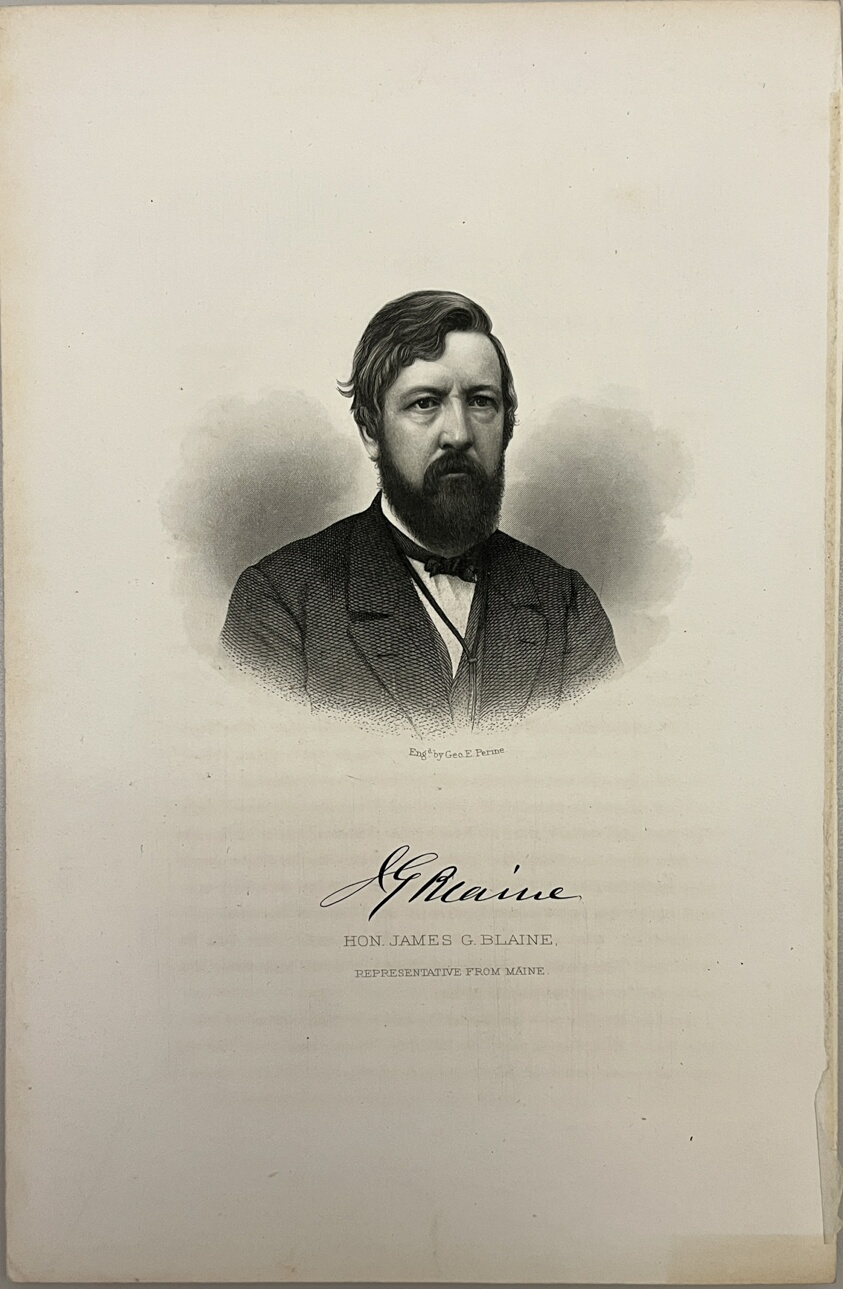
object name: Print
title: James G. Blaine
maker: Artist Unknown (Likely American or British, 19th century)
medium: Steel engraving on paper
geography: United States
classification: reproduction; print; prints and drawing